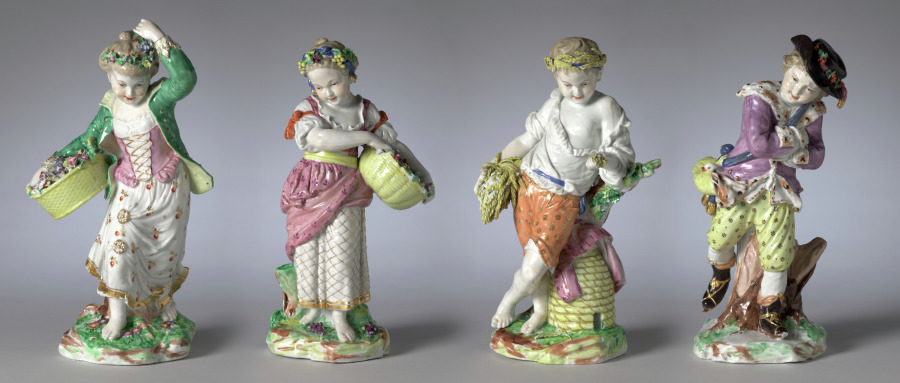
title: Figures Depicting the Four Seasons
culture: England, Bristol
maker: Bristol Porcelain Factory (British, 1770–81)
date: c. 1775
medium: hard-paste porcelain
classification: Ceramic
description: In this group depicting the four seasons, a young boy in ice skates represents winter; a young lady adorns her hair with flowers in spring; a young man guards his beehive in summer; and a girl gathers fruit in autumn.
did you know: Allegorical figures most often decorated a table during the dessert course, providing amusing subjects for conversation.